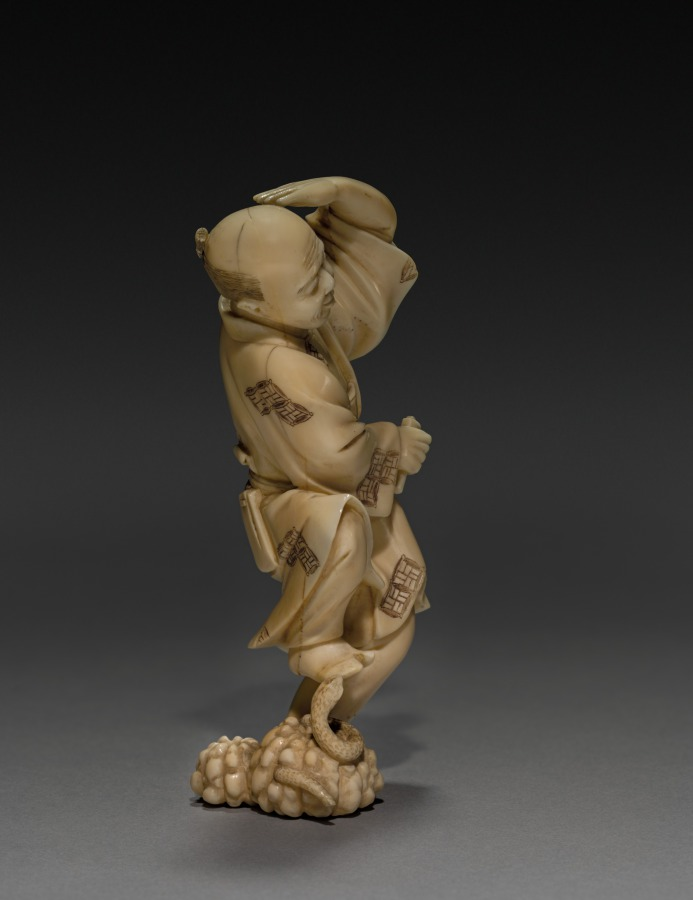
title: Man and Serpent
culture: Japan, Meiji period (1868–1912)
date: early 1900s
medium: ivory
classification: Ivory